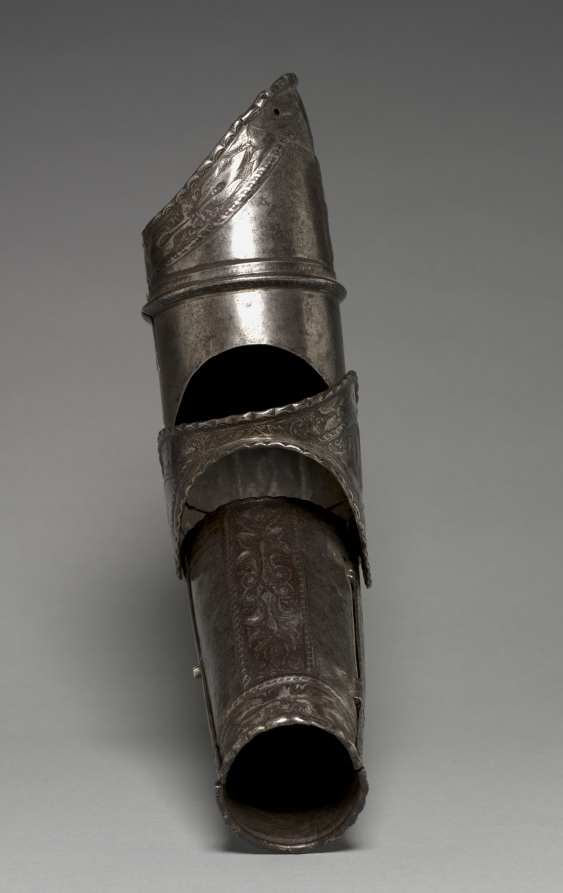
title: Left Arm Elements from a Boy's Armor (Lower Cannon, Couter, Rerebrace)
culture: Germany, Augsburg, mostly 17th Century (some modern)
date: c. 1560 (some modern)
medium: etched and lightly embossed steel with traces of gilding, leather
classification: Arms and Armor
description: These elements once belonged to a full suit of armor that would have been made for a young boy. Decorated with etching, embossing, and gilding, the original suit would have been impressive. Dressing your sons in small custom suits of armor was popular with the wealthiest nobles. They would have been worn for parades and ceremonial occasions and once outgrown were often kept as mementos. Made for the left arm, the rerebrace or upper cannon protected the upper arm, the couter the elbow, and the lower cannon the forearm.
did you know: Small-scale suits of armor would help prepare a young boy for knighthood.